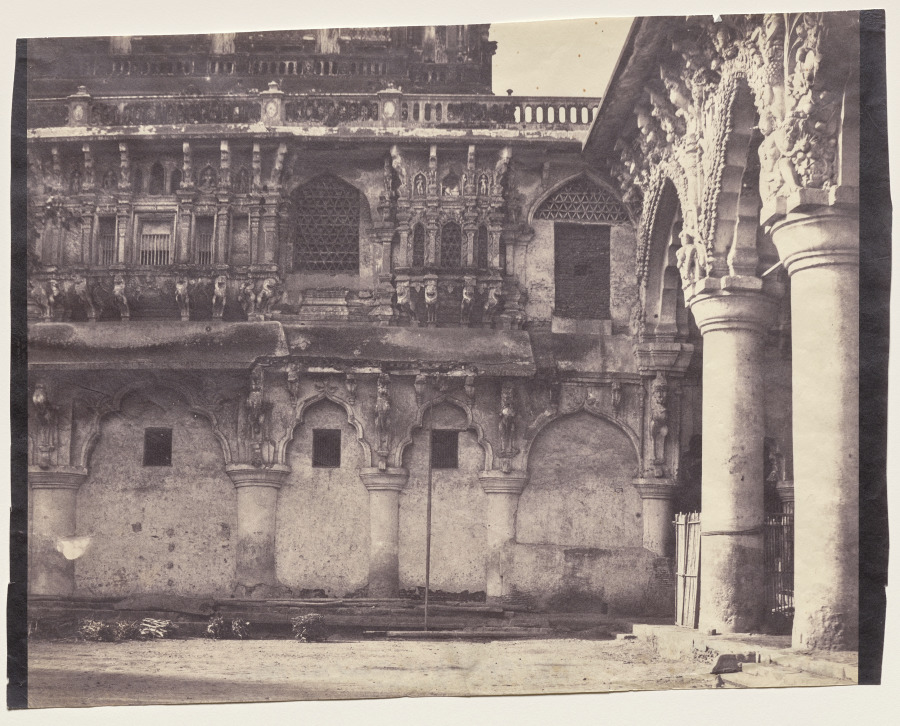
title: South Façade of the Quadrangle of the Nayak Darbar Hall, Thanjavur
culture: England, 19th century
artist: Captain Linnaeus Tripe (British, 1822–1902)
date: 1858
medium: albumenized salt print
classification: Photograph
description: Early box cameras had no shutter; the photographer just removed and replaced the lens cap, guessing at how long to leave it off. Linnaeus Tripe’s mastery of light and exposure here is incredible. The print allows us to read the decoration that is in shadow as well as that in full sunlight.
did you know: This assembly hall is an important example of the Islamic influences brought by the Nayaks to South Indian architecture in the 1600s.